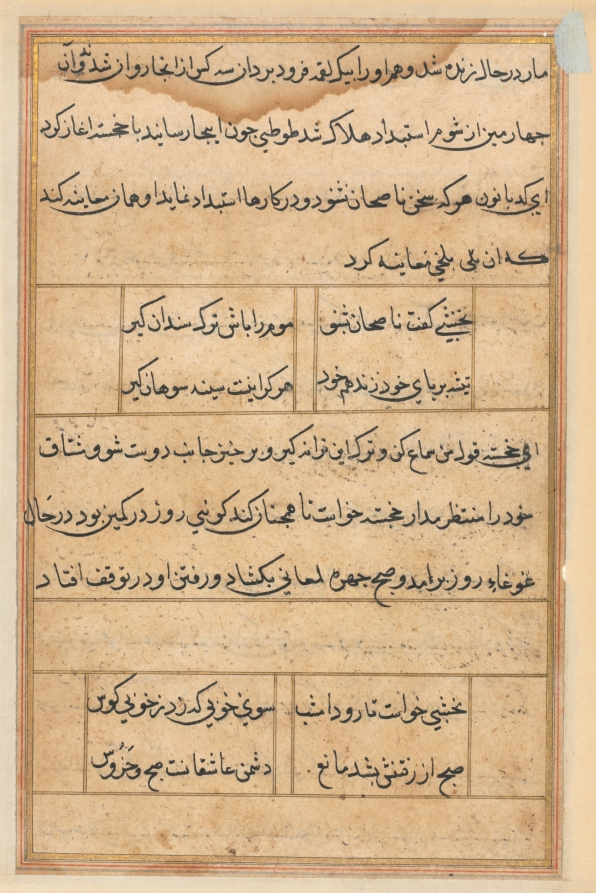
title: Page from Tales of a Parrot (Tuti-nama): text page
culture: Mughal India, court of Akbar (reigned 1556–1605)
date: c. 1560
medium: gum tempera, ink, and gold on paper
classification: Painting